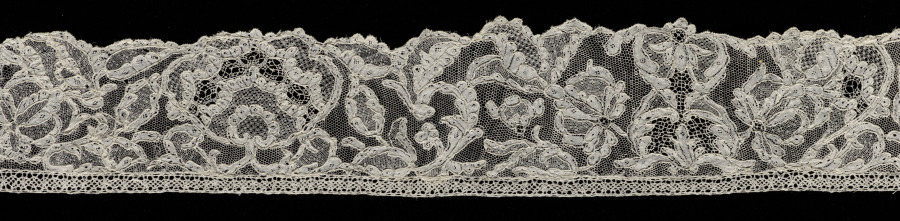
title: Lace Edging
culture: France, Alençon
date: 1700s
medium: Linen: needle lace (Point d'Alençon)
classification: Lace